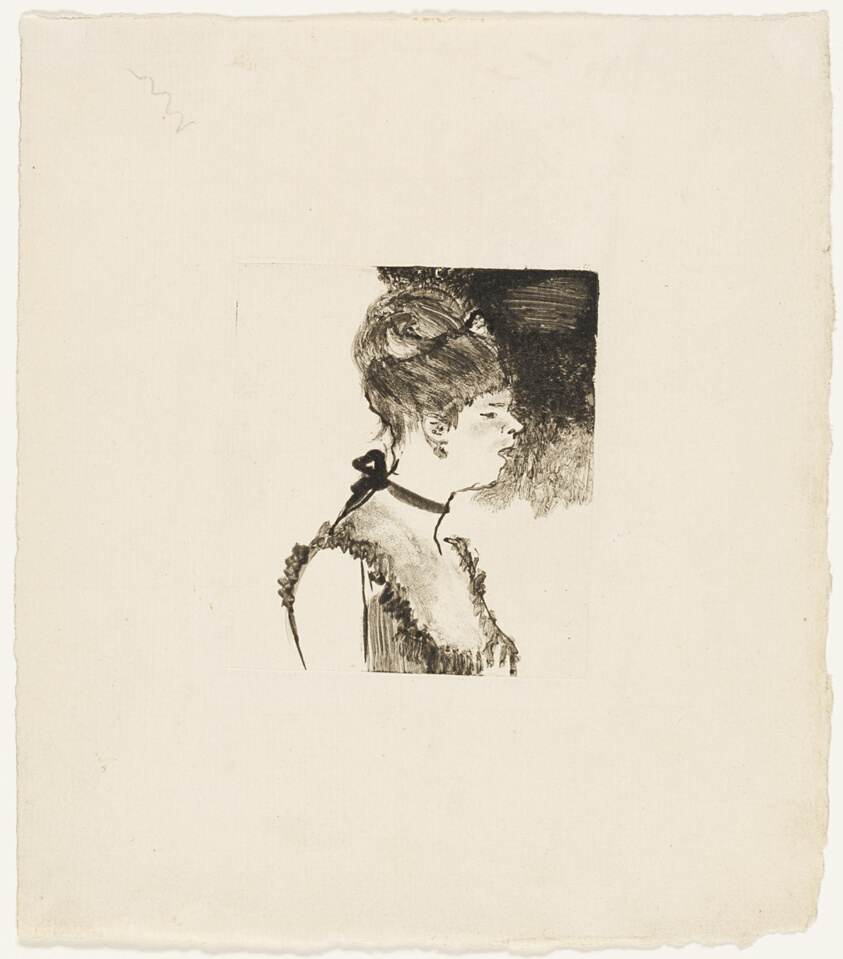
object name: Print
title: Café-Concert Singer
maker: Edgar Degas; French, 1834-1917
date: 1878/80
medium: Monotype in black ink on cream laid paper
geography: France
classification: monotype; print; prints and drawing; paper